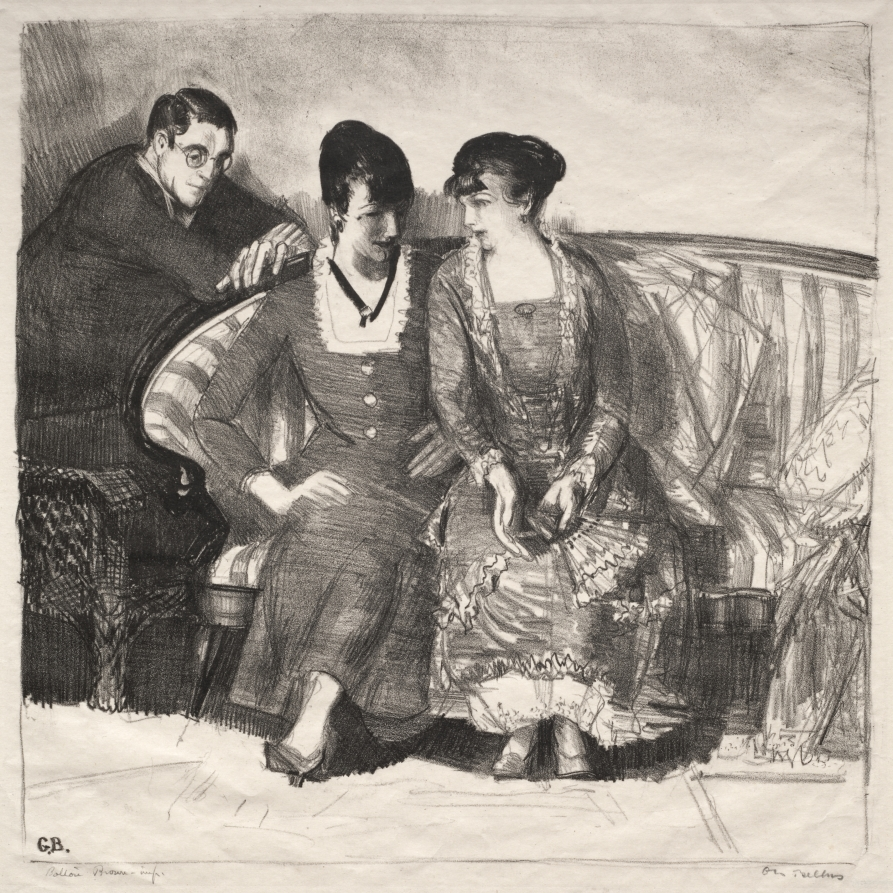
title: Emma, Elsie and Gene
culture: America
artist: George Bellows (American, 1882–1925)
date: 1921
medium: lithograph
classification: Print